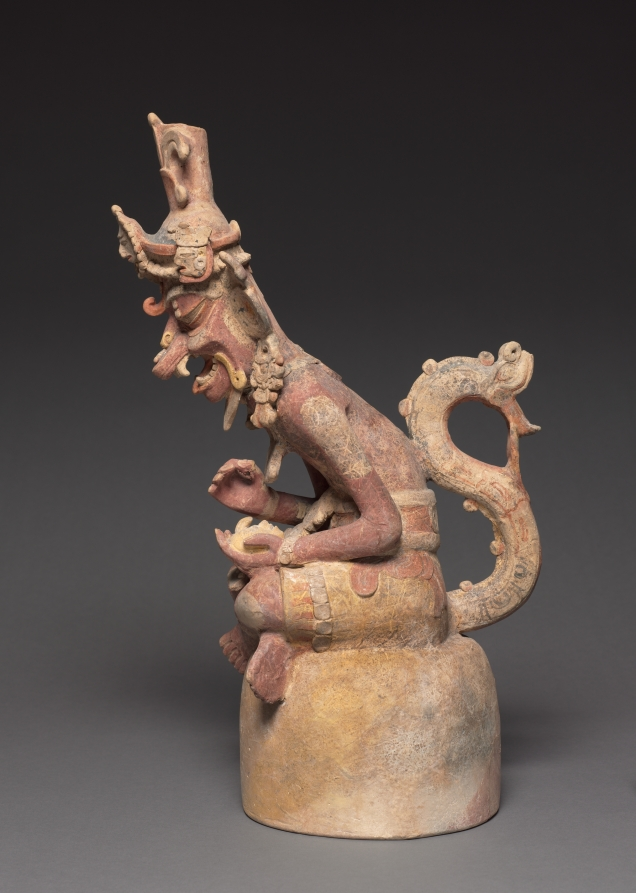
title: Artisan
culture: Guatemala, Petén region, Maya style (250-900), Maya style (250-900)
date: 250–600 CE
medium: earthenware with colored slips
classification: Sculpture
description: These figures represent the supernatural patrons of the visual arts and writing: the brothers Hun Batz and Hun Chuen ("One Monkey" and "One Artisan"). The two were refined artists but also bullies who tormented their younger brothers, who took revenge by transforming their elders into monkeys. Many Maya representations of the painter-scribes immortalize this fate by depicting the pair with both simian and human features, as here. The brothers are shown engaged in artistic or scribal pursuits. Sitting on high-domed bases that may have served as the lids of incense or offering bowls, each apparently once grasped a tool in his upper hand-for instance, a paint brush or a stylus for writing. In the lower hand, one cradles a small mask and the other, a piece of bark that likely refers to the beaten bark from which the Maya made books.